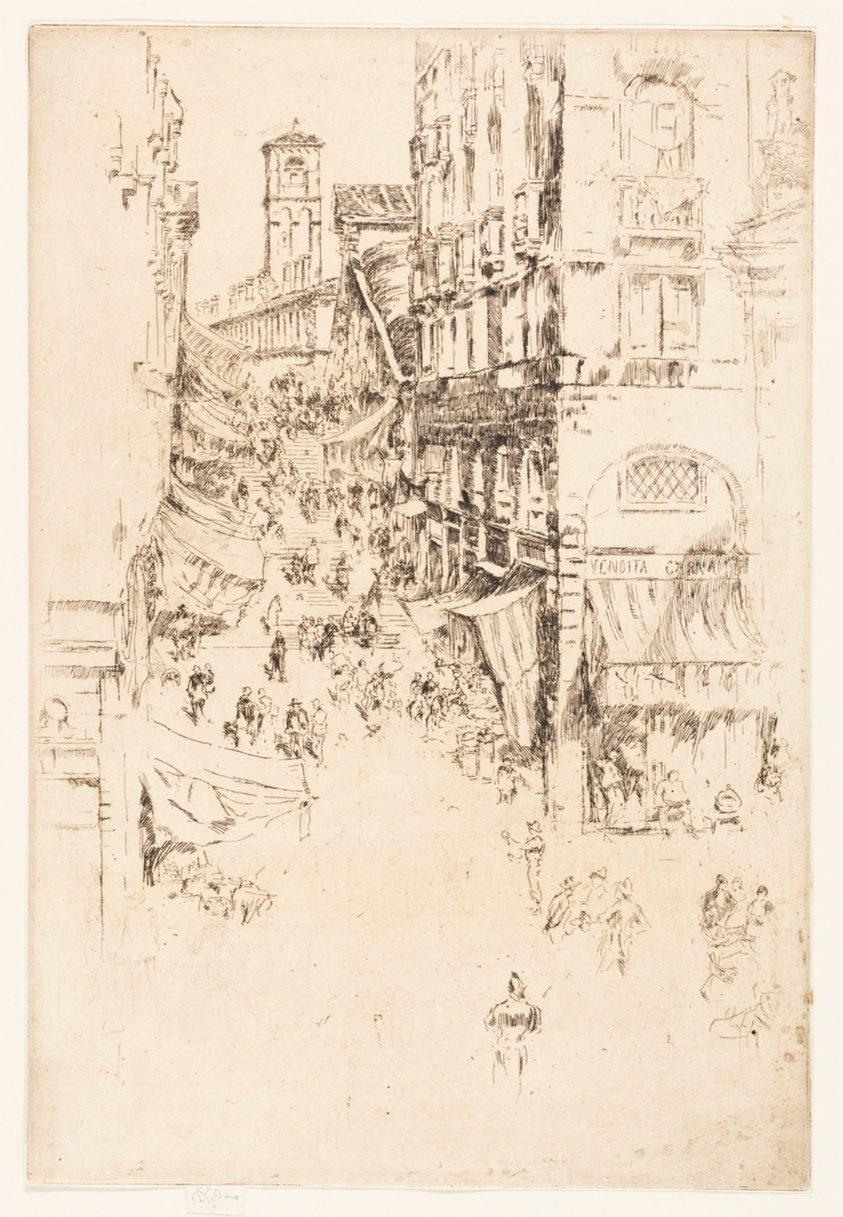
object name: Print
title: The Rialto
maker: James McNeill Whistler (American, 1834-1903)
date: 1879/80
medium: Etching with foul biting in black ink on ivory laid paper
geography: United States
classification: etching; foul biting; print; prints and drawing; paper